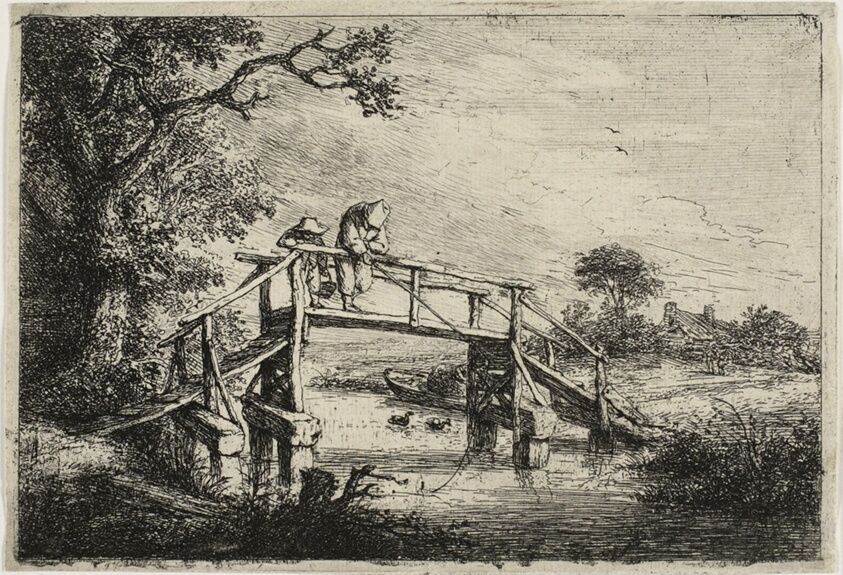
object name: Print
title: The Anglers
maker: Adriaen van Ostade (Dutch, 1610-1685)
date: c. 1647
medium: Etching in black on cream laid paper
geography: Holland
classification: etching; print; prints and drawing